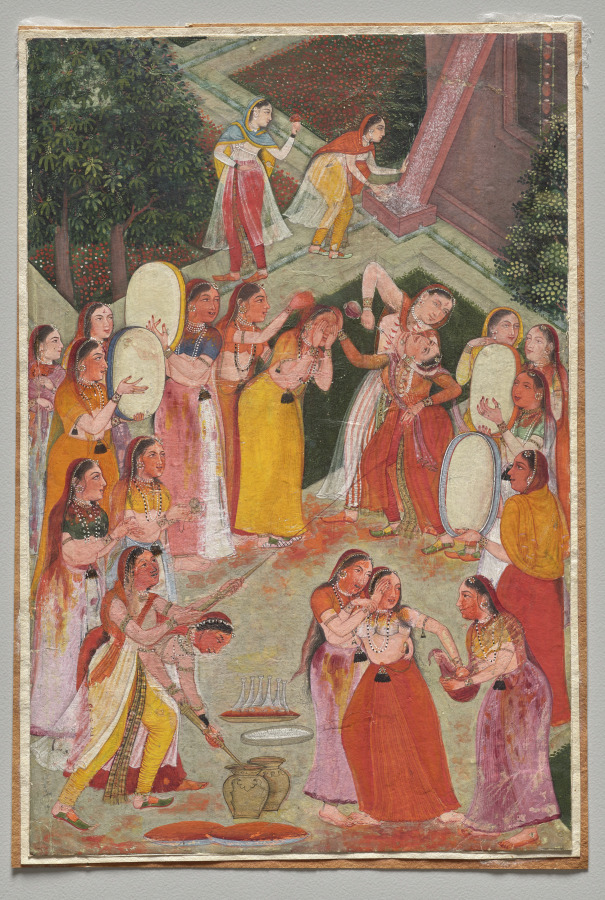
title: Girls Spraying Each Other at Holi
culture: Northwestern India, Rajasthan, Rajput Kingdom of Bikaner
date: c. 1640–50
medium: Gum tempera, ink, and gold on paper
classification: Painting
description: The antics of Holi, the festival of spring, are in full tilt in this scene that takes place in the women's quarters of a palace. Most of the women have already been stained with the red and yellow colors that they squirt and smear on one another to the beat of handheld drums and a lively song. In a composition repeated from an imperial Mughal scene, one woman aggressively and playfully has another in a headlock and pours red liquid down her blouse. The princely state of Bikaner had close ties with the Mughal court, and some of its artists were familiar with Mughal painting, as is evident in the rendering of the garden and the figures.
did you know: The sandstone cascade at the top of the page propels water through the garden channels.